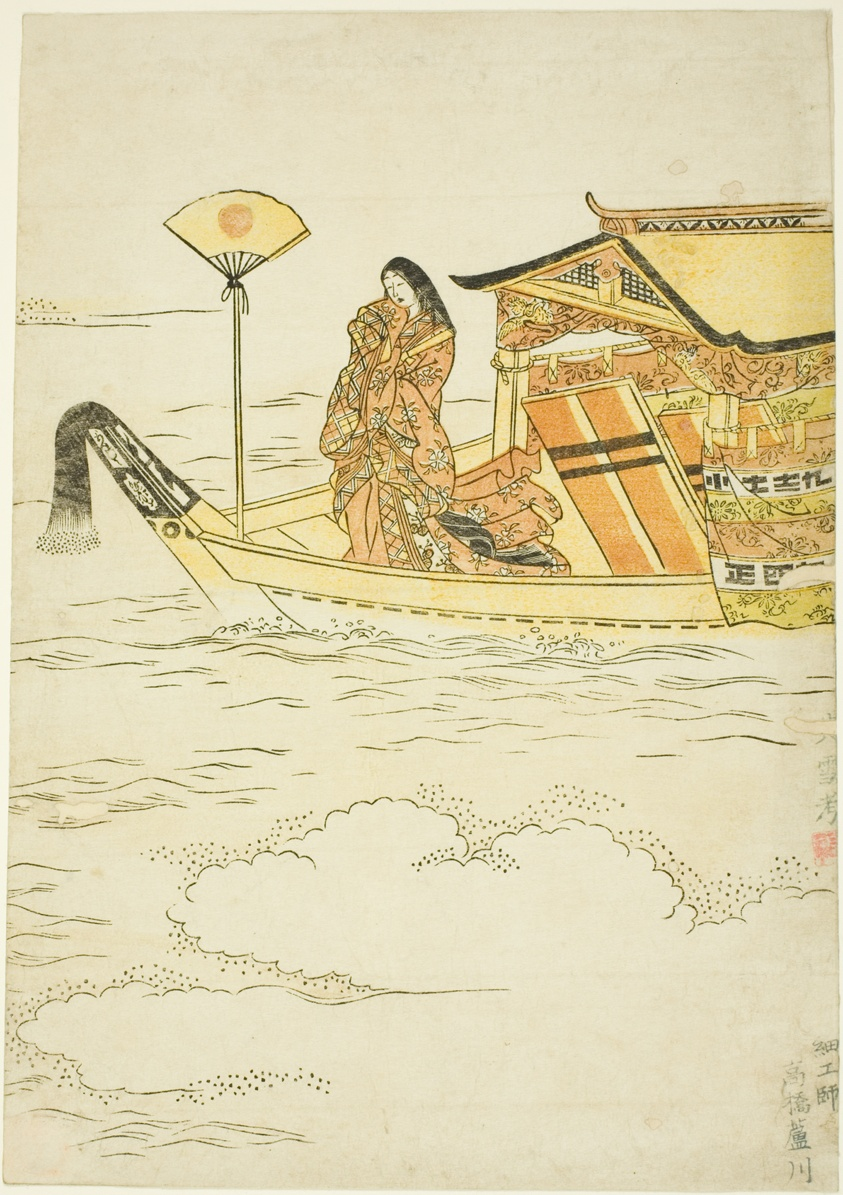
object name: Print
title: Lady Tamamushi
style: Japanese (culture or style)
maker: Artist unknown; Japanese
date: 1765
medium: Color woodblock print; chuban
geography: Japan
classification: woodblock print; print; asian art